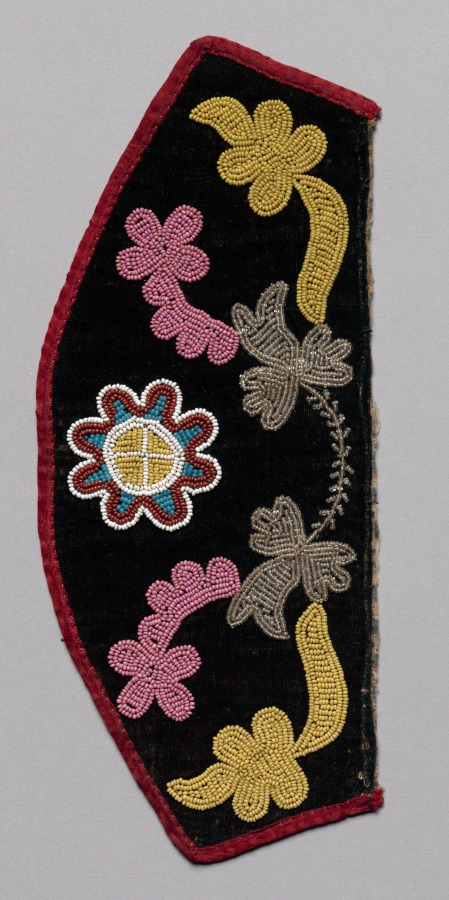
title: Cuff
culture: Northeast Woodlands, Great Lakes Region, Anishinaabe (Ojibwe) or Nehiyawak (Cree) People?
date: late 1800s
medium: Velvet, satin, glass beads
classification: Garment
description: In the 1800s, native peoples began to use European fabrics to fashion fine formal garments; they favored sturdy cloth, such as velvet and wool broadcloth, which provided support for heavy decorative beadwork that was added by hand. Often the fabric was a dark color, providing dramatic contrast for the multicolored beads. Rather than encrusting the entire garment, beadwork was confined to cuffs, “epaulettes,” bib-like plackets and yokes, rectangular panels sewn to leggings, shirts, and dresses, and the like.